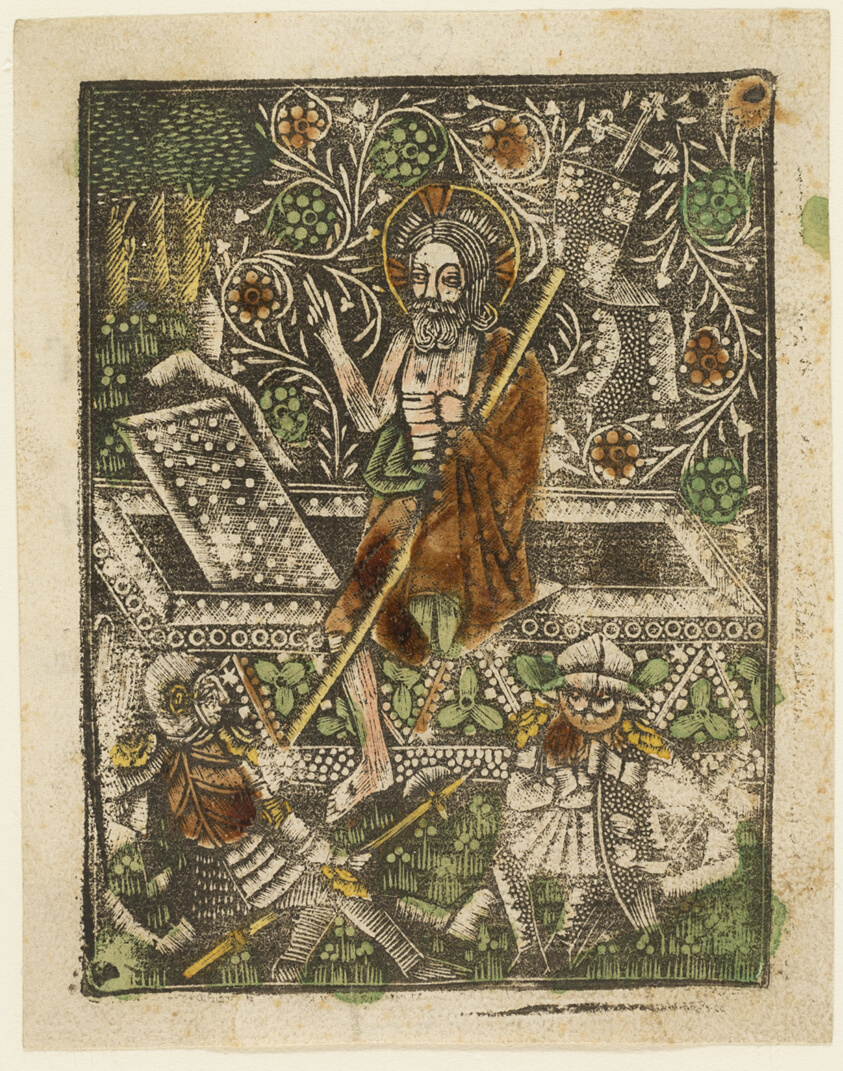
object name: Print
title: The Resurrection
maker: Artist unknown; Bavarian, 15th century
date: 1460–65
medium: Metalcut in black hand colored with brush and watercolor in yellow, red-brown lake, and green, on ivory laid paper, with manuscript text in pen and brown ink on verso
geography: Germany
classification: dotted/metal cut; book; prints and drawing; print